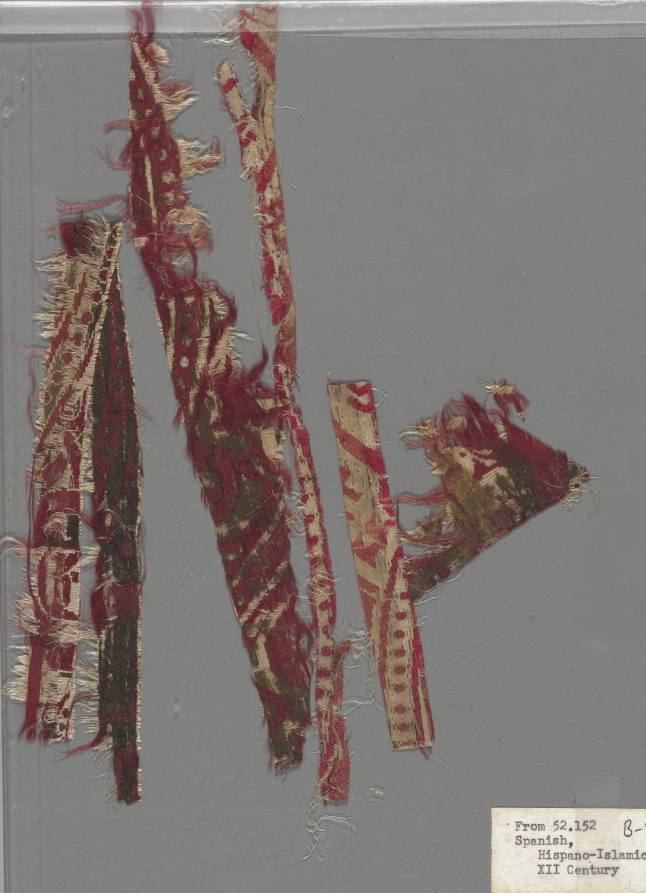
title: Lampas with griffins in roundels, from the Reliquary of Saint Librada in Siguenza Cathedral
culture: Spain, Almeria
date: 1100–50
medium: Silk and gold thread: lampas and plain-weave variant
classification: Textile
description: Mirrored griffins with gold heads dominate these roundels, as they turn their heads unnaturally to stare at each other across their wing tips. The pairs of dragons in the framing border, however, have lost their artistic impact since the green silk thread has disintegrated into brown specks. Luxury silks woven in Islamic Spain were worn by Christian kings throughout Europe. Their patterns also influenced designs in Jewish synagogues and were the standard aesthetic of the elaborately decorated walls in the Muslim Alhambra palace in Granada. This silk is from the reliquary of Saint Librada in Siguenza Cathedral, northeast of Madrid.